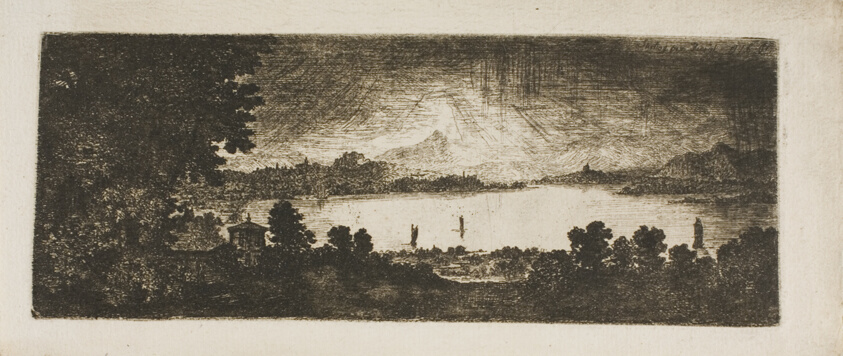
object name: Print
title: Stirling from Kinnsill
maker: John Clerk of Eldin (Scottish, 1728-1812)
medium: Etching on paper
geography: Scotland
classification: etching; print; prints and drawing